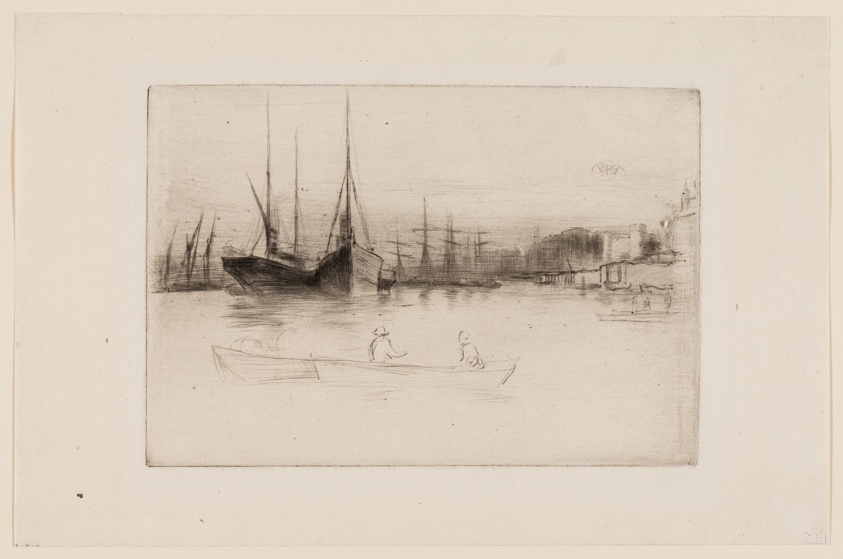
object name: Print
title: Steamboats off the Tower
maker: James McNeill Whistler (American, 1834-1903)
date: 1875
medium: Drypoint in black ink on off-white laid paper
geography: United States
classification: drypoint; print; prints and drawing; paper